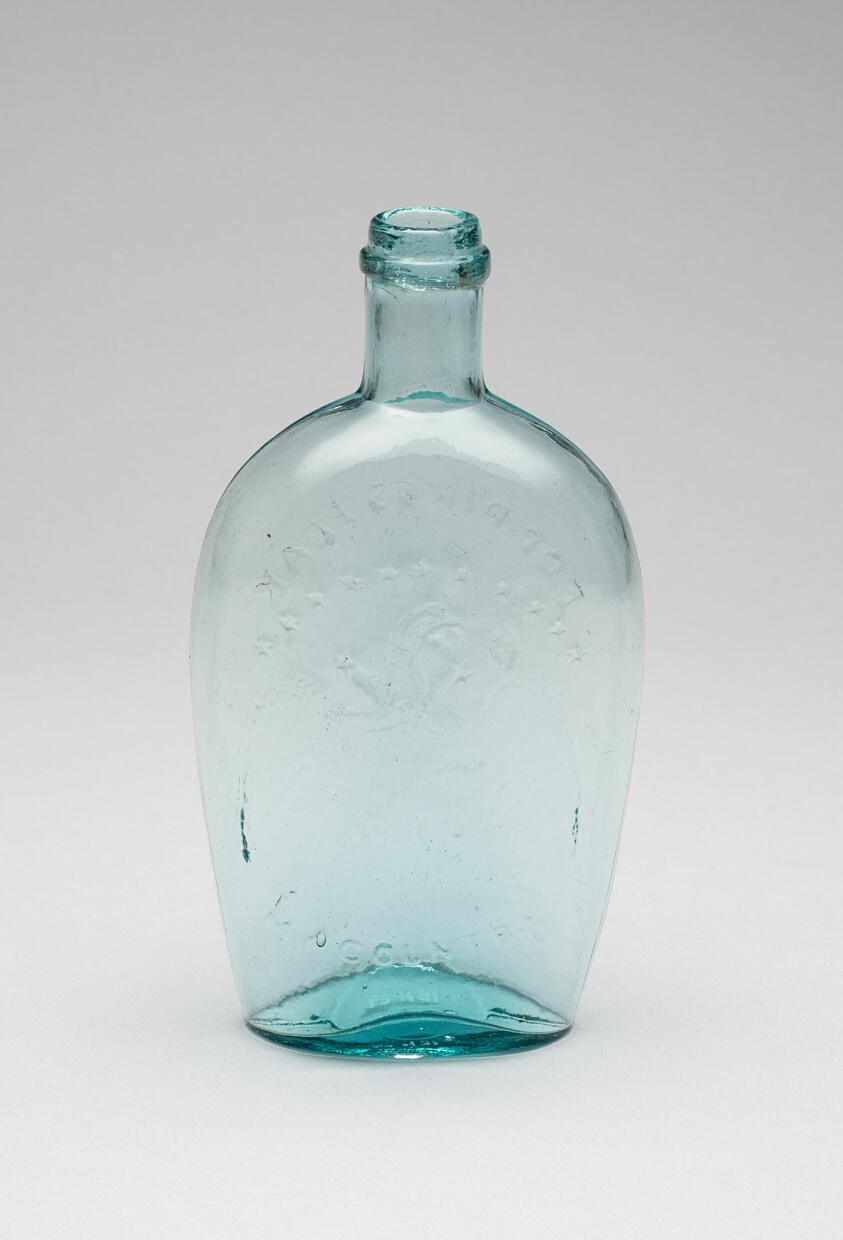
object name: Glass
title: Flask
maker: Artist unknown (American, 19th century); Probably Midwest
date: 1860–75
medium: Glass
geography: Midwest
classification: flask (bottle); glass; american decorative arts; american arts; decorative arts